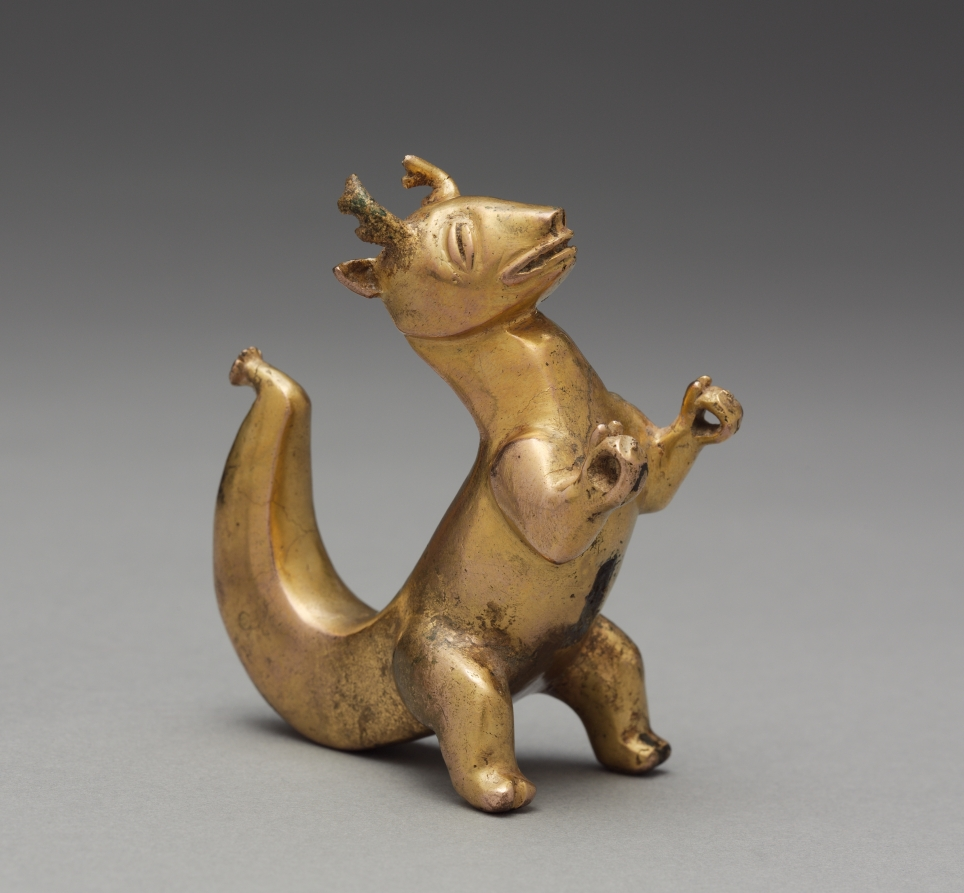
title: Pendant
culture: Panama, International style, 5th-7th century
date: 400–700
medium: cast gold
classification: Metalwork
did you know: Panning for gold was viewed as a sacred activity among the ancient inhabitants of Costa Rica and Panama.